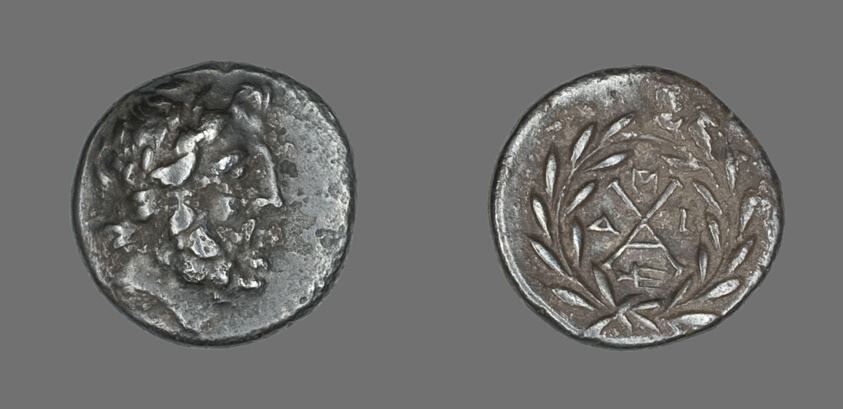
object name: Coin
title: Hemidrachm (Coin) Depicting the God Zeus Amarios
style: greek, ancient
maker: Greek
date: before 222 BCE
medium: Silver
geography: Mantinea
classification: coin; ancient art